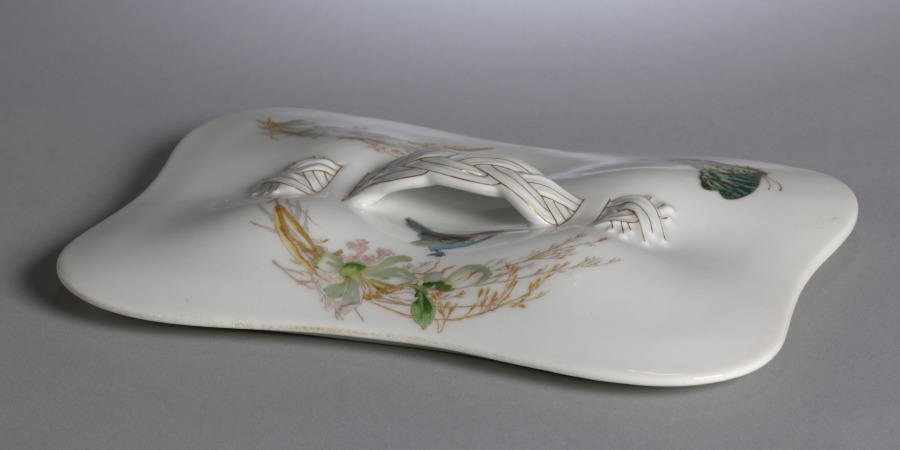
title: Cover for a Vegetable Bowl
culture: France, Limoges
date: c. 1890–1910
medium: porcelain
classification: Ceramic